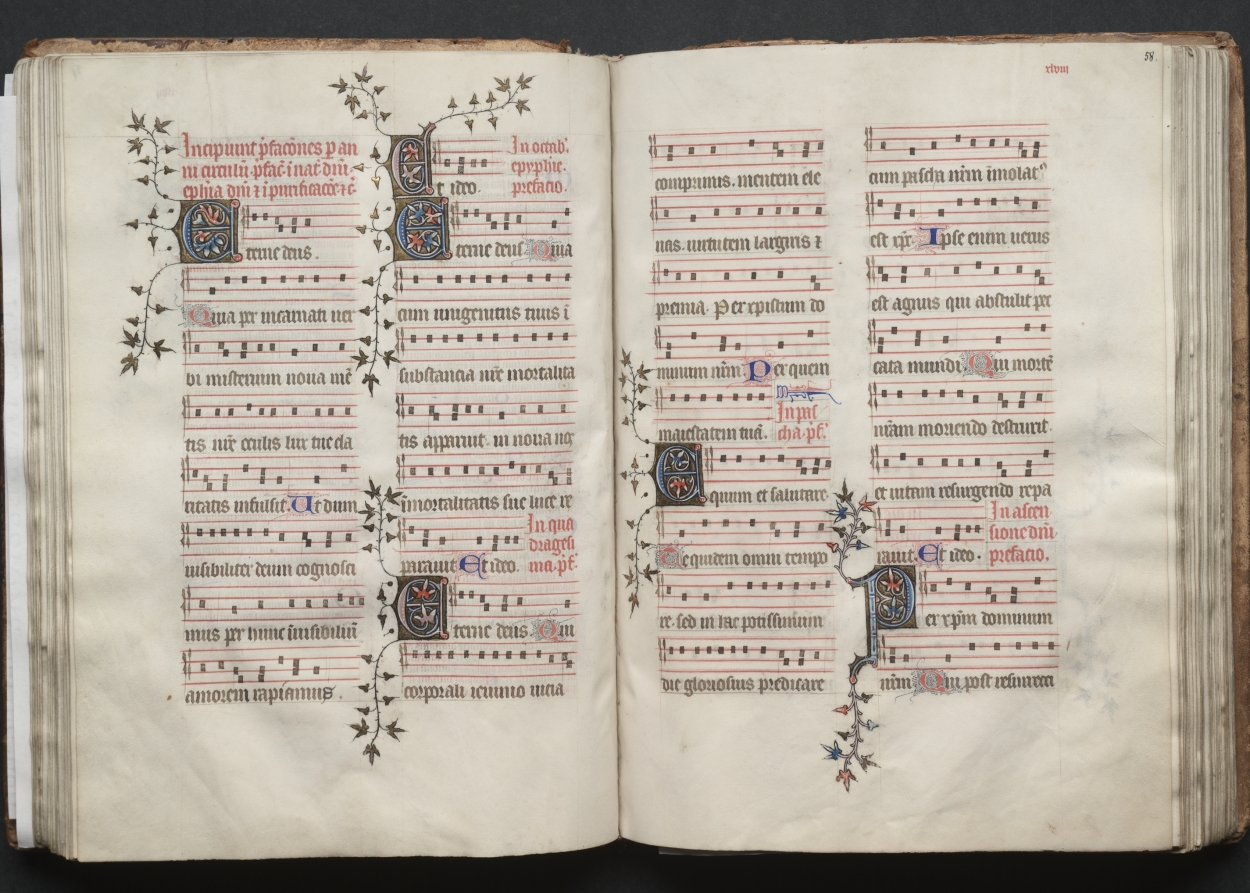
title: The Gotha Missal: Fol. 58r, Text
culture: France, Paris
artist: Master of the Boqueteaux (French)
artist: and Workshop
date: c. 1375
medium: ink, tempera, and gold on vellum; blind-tooled leather binding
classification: Bound Volume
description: The style and quality of this manuscript's decoration is typical of deluxe Parisian books made for aristocratic or royal patrons. Most of the book's decoration appears to be the work of the Master of the Boqueteaux, an artist active at the court of King Charles V (died 1380). His style was apparently shared by a number of book illuminators working in and around Paris. It is very possible that the Gotha Missal belonged to Charles V, but is not provable because the manuscript has no royal portraits and lacks a colophon. Given the book's magnificent decoration, however, it would seem that it was produced for a Valois prince, if not for the king himself. The manuscript receives its name from the German dukes of Gotha, its later owners.